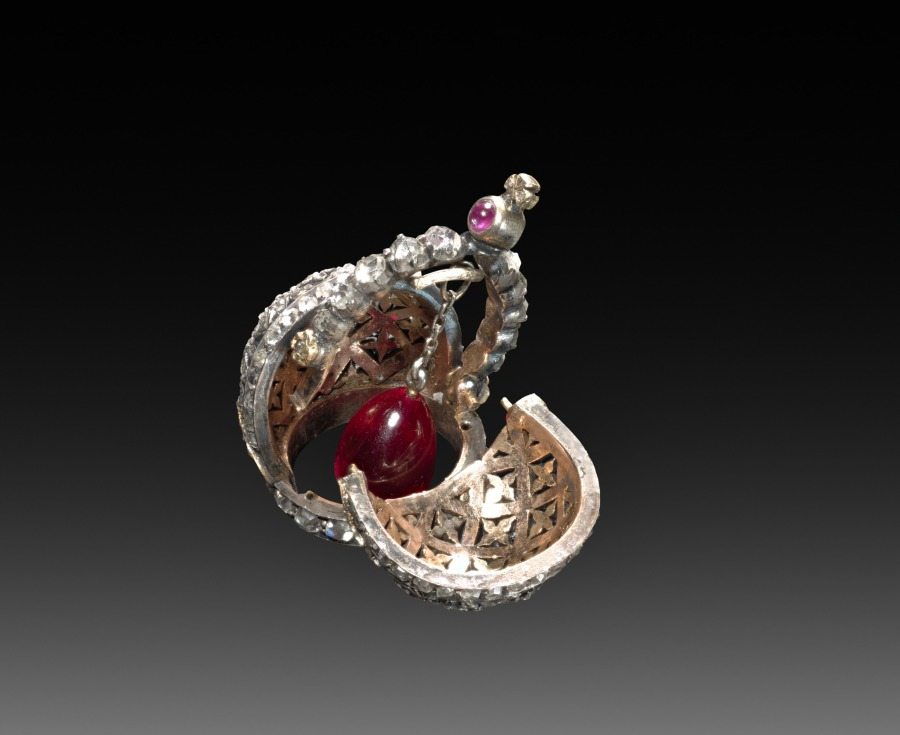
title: Miniature Crown Surprise from the Lapis Lazuli Easter Egg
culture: Russia, St. Petersburg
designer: attributed to Peter Carl Fabergé (Russian, 1846–1920)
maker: attributed to House of Fabergé (Russian, 1842–1918)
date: c. 1885–90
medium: gold, enamel, lapis lazuli, pearls, diamonds, rubies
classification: Miscellaneous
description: This Easter egg, like the subsequent ones produced by Fabergé for the imperial family, contains a surprise when opened. In this case, the egg opens to display a yellow enameled cover, resembling an egg yolk, which then opens to reveal a tiny replica of the Russian imperial crown, containing either a ruby or a pink sapphire suspended on a chain.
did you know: The tiny diamond encrusted crown surprise is a replica of the Russian imperial crown made for Empress Catherine the Great in the 1700s.